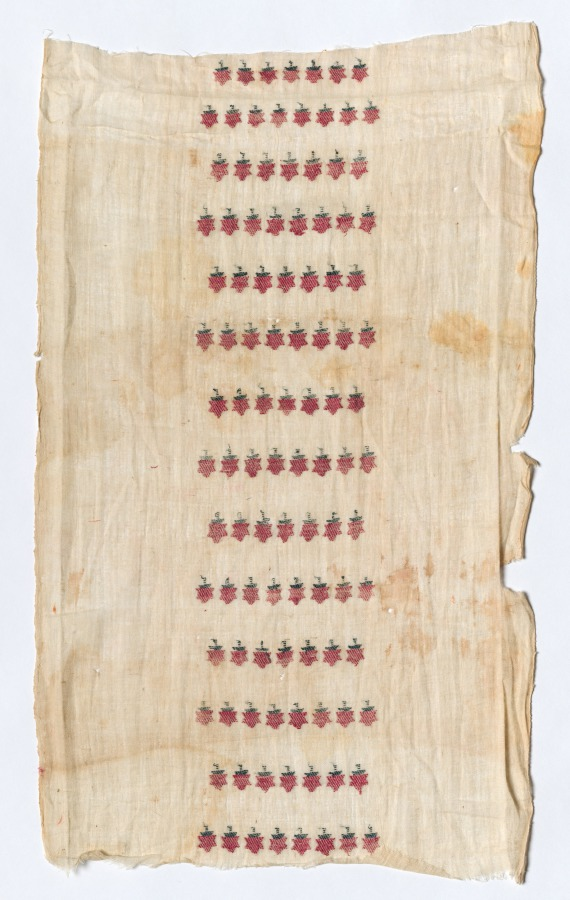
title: Turban "Patka"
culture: India, Rajputana, 18th-19th century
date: 1700s - 1800s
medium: brocaded muslin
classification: Textile